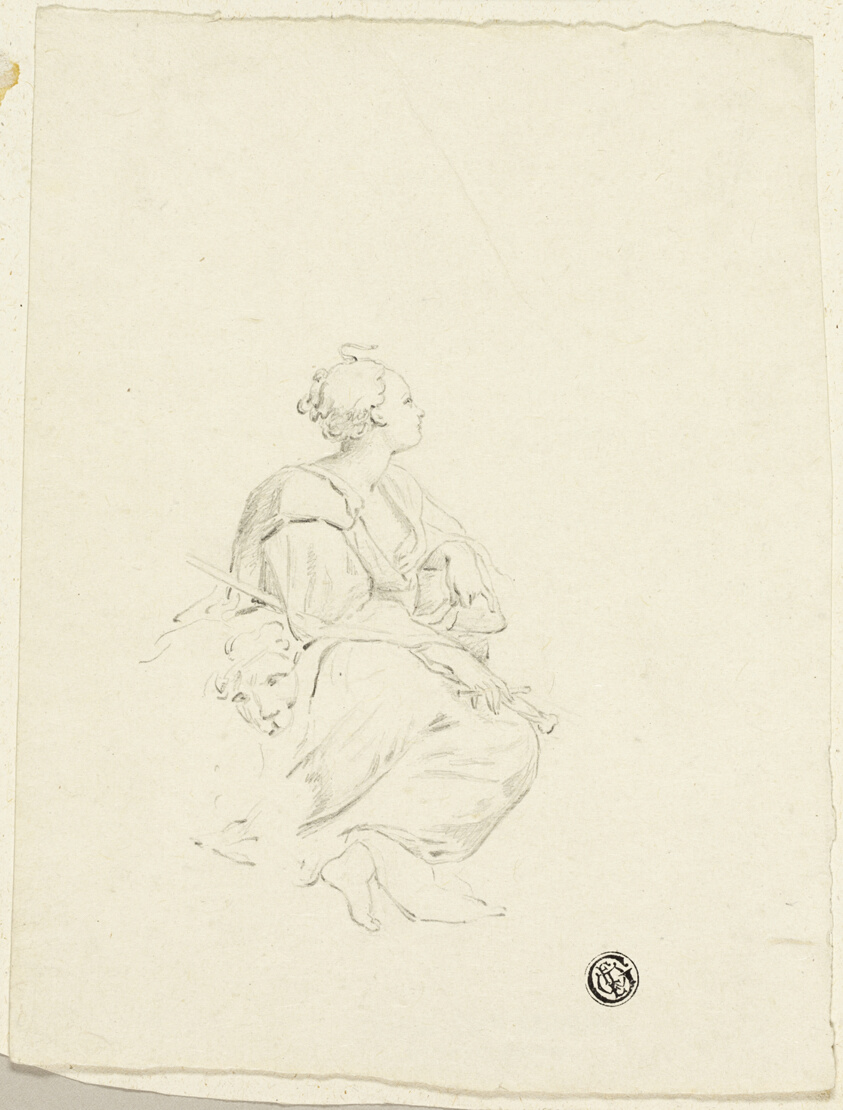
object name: Drawing and Watercolor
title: Cardinal Virtues or Saint Euphemia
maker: After Antonio Allegri, called Correggio; Italian, 1489?-1534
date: 1750/1850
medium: Graphite on ivory laid paper, tipped on to ivory wove paper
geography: Italy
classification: graphite; drawings (visual works); prints and drawing